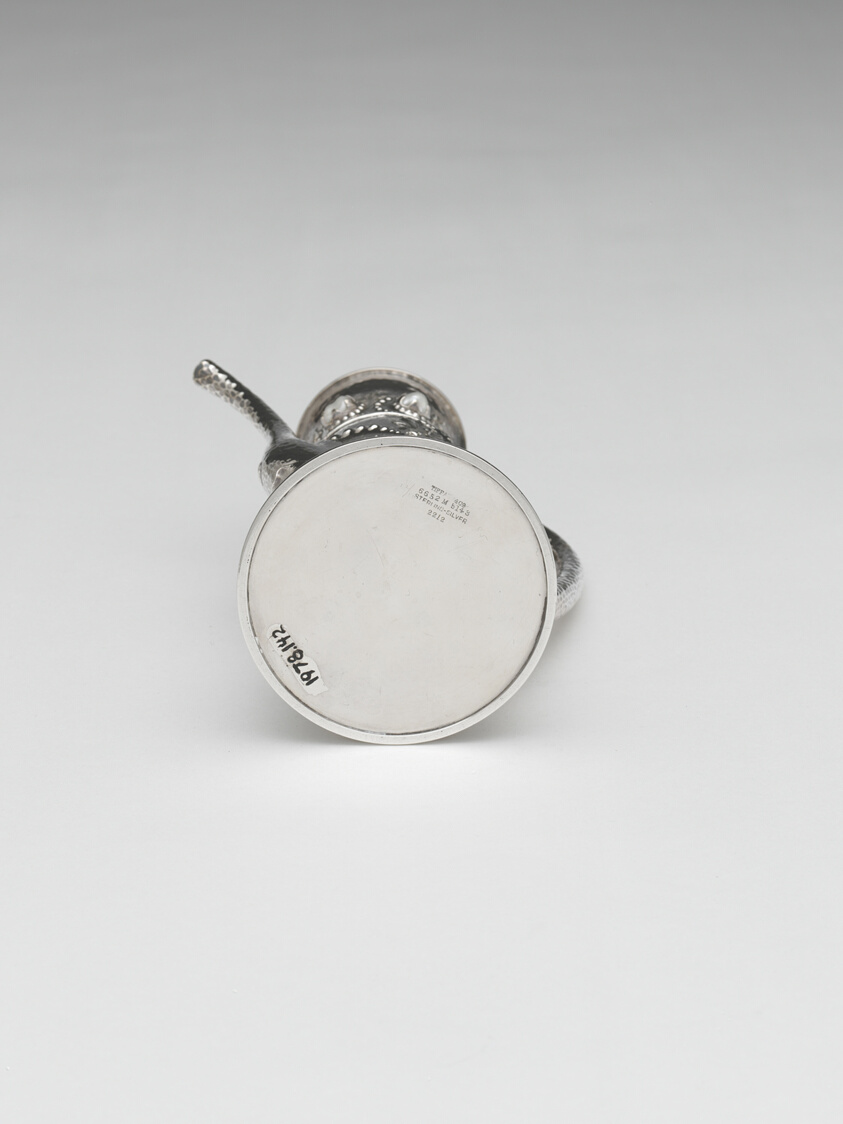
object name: Metalwork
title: Coffee Pot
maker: Design attributed to Charles Osborne (American, 1847–1920); Tiffany and Company (American, founded 1837); New York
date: 1881–89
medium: Silver, pearls, chalcedony, and ivory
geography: New York City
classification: coffeepot; silver; american decorative arts; american arts; decorative arts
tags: dining, drinking